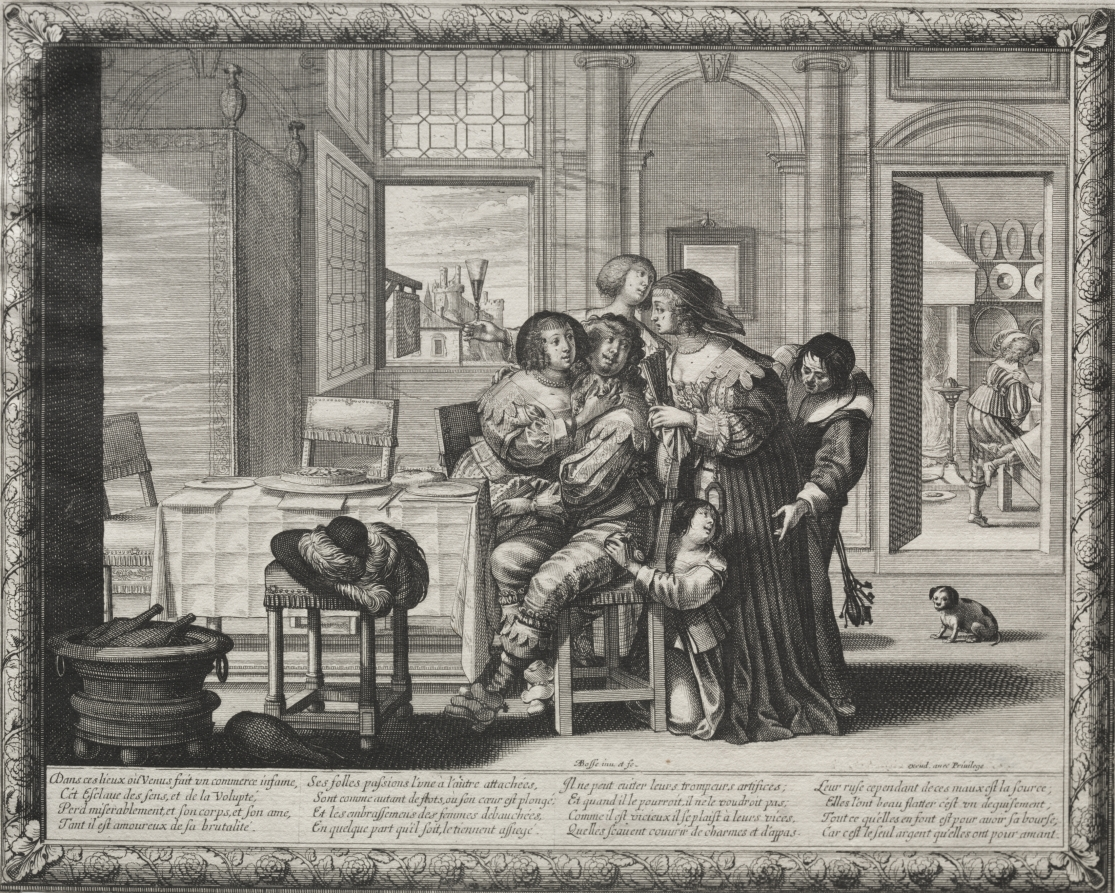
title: The Prodigal Son: Riotous Living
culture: France, 17th century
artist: Abraham Bosse (French, 1602–1676)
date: 1635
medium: etching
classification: Print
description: In the biblical proverb of the prodigal son (Luke 15:11–32), the son wastes his inheritance at a brothel; destitute, he returns to his father and is forgiven. Though the story is meant as a lesson of repentance, artists often focused on the brothel scene, which allowed them to explore the son’s morally questionable choices. This print depicts the interior of a brothel as if it were an opulent home from the 1600s. Three women, a man, and a child distract the son to steal his coin purse. One woman holds a triangular glass of wine, highlighting the role of wine in the son’s carnal desires and eventual ruin.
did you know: An open window reveals the brothel's crescent-moon signboard. Such symbols may have been associated with vice in seventeenth-century Europe.